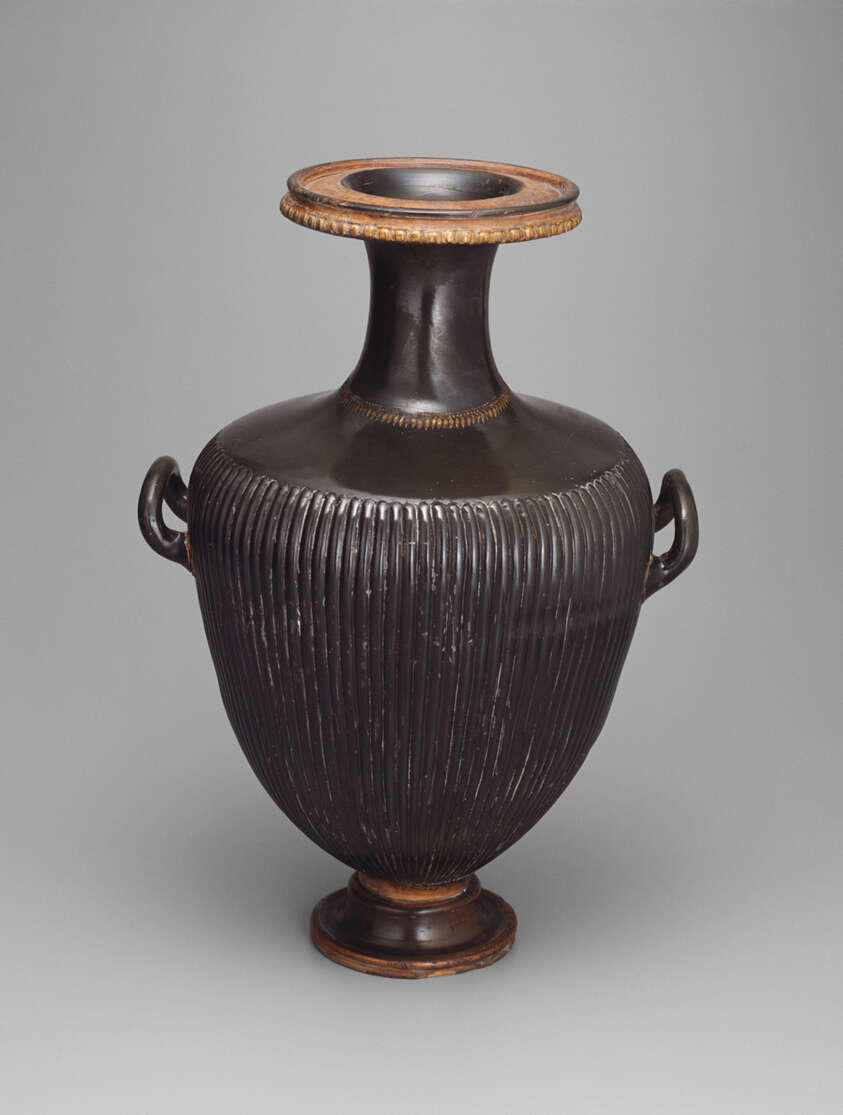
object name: Vessel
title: Hydria (Water Jar)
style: gnathian, apulian, south italian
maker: Greek; Campania, Italy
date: 350-330 BCE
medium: terracotta, black-glaze with gilded raised clay and ribbing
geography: Apulia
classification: vessel; earthenware; ceramics; ancient art